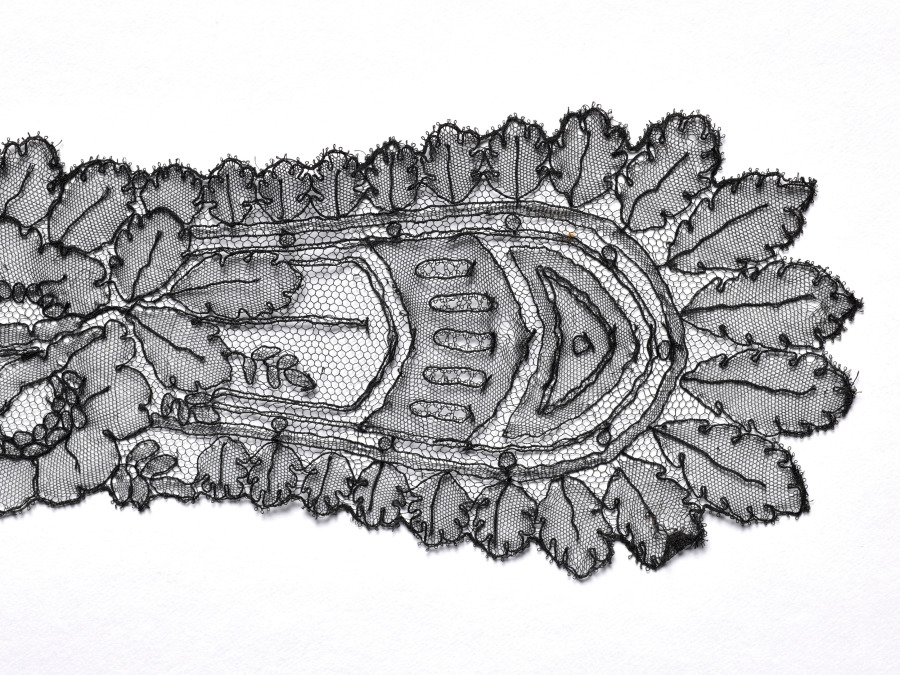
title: Lace Barb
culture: France, Chantilly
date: 1800s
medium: Cotton: machine-made lace and embroidered net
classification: Lace